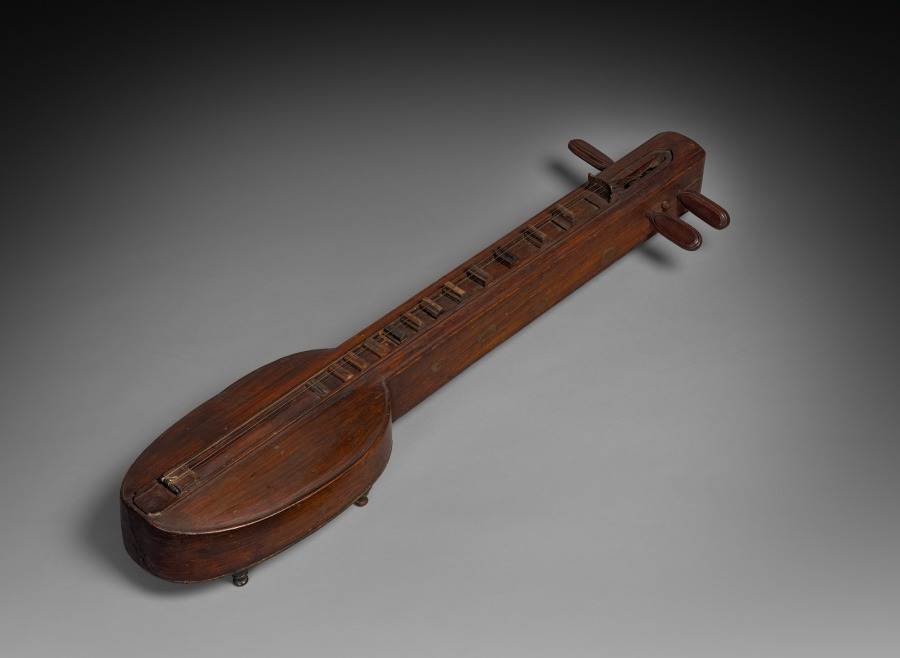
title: Ta'khe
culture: Cambodia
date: 1800s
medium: Tropical hardwood with ferrous metal and silk strings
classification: Musical Instrument